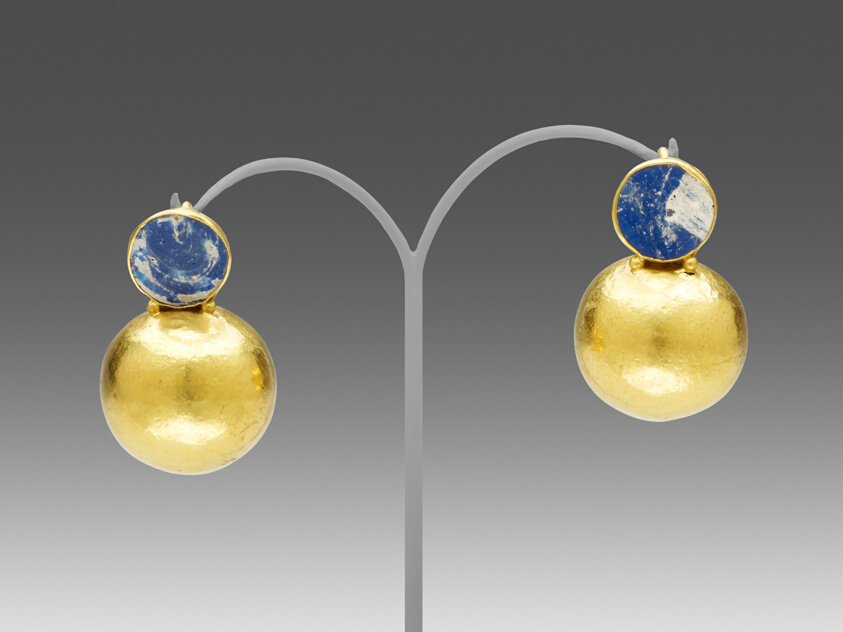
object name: Costume and Accessories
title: Pair of Earrings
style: greco-roman (egyptian), ancient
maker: Roman; probably Egypt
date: 1st century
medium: Gold and glass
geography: Roman Empire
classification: ear ornament; gold; metal; jewelry; ancient art; costume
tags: beauty, rituals